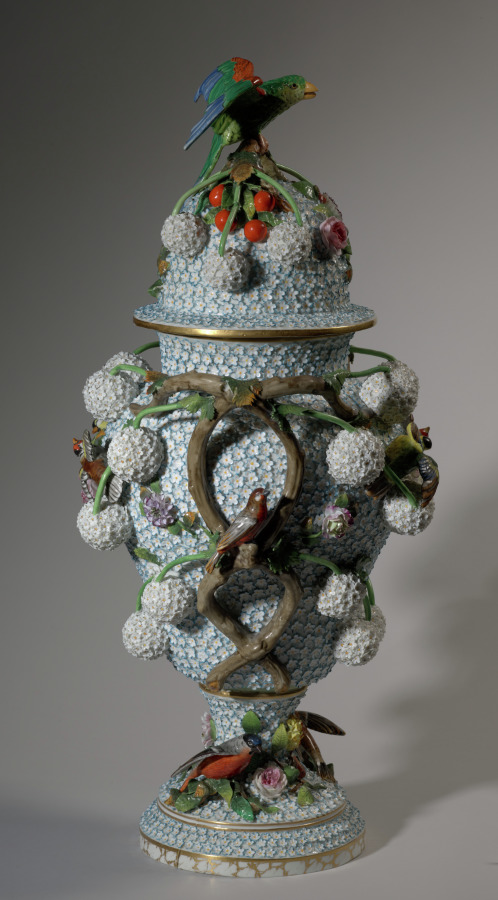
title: Vase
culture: Germany, 19th century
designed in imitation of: Meissen Porcelain Factory (German, est. c. 1710)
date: 1850–1899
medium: porcelain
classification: Ceramic